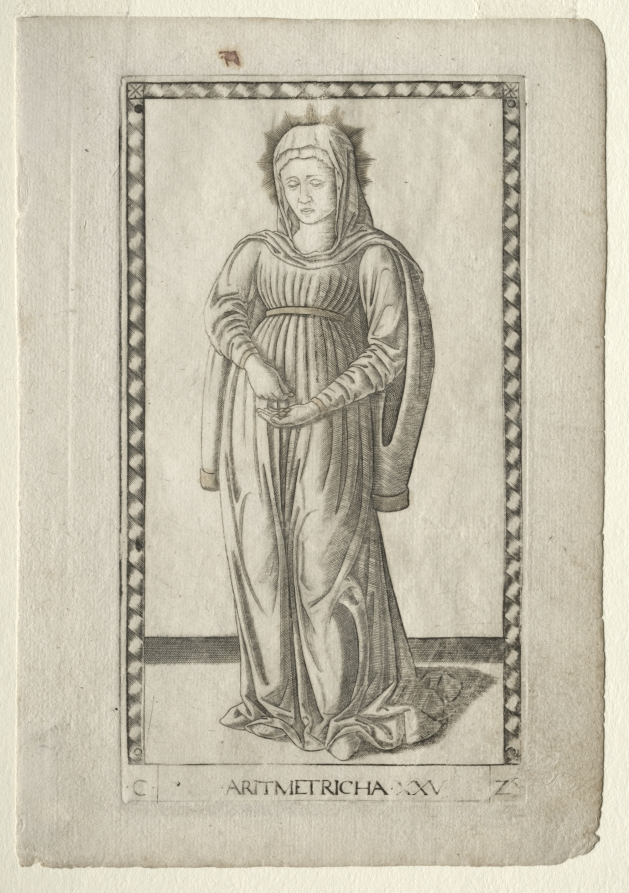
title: Arithmetic (from the Tarocchi, series C: Liberal Arts, #25)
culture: Italy, Ferrara, 15th century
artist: Master of the E-Series Tarocchi (Italian, active 1460s)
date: before 1467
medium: engraving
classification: Print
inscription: Lettered below the image of Aritmetricha (Arithmetic): ·C· / ·ARITMETRICA·XXV· / 25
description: This engraving is part of the group “C” named Liberal Arts. Conceptually, the liberal arts descended from classical antiquity, and were divided into the Trivium (Grammar, Rhetoric, and Dialectic or Logic) and the Quadrivium (Music, Geometry, Arithmetic, and Astronomy). In the Tarocchi set the total number was risen to ten, with the addition of the three disciplines (Poetry, Philosophy, and Theology). The liberal arts denoted knowledge or skills considered necessary to participate in a free society. By the late Middle Ages, they began to be represented in the visual arts as womanlike allegories. Here, Aritmetricha (Arithmetic) is personified as a full-length female figure, turned slightly to left. Arithmetic is regarded as the science that teaches counting. In this engraving, she is displayed counting coins in her hands.